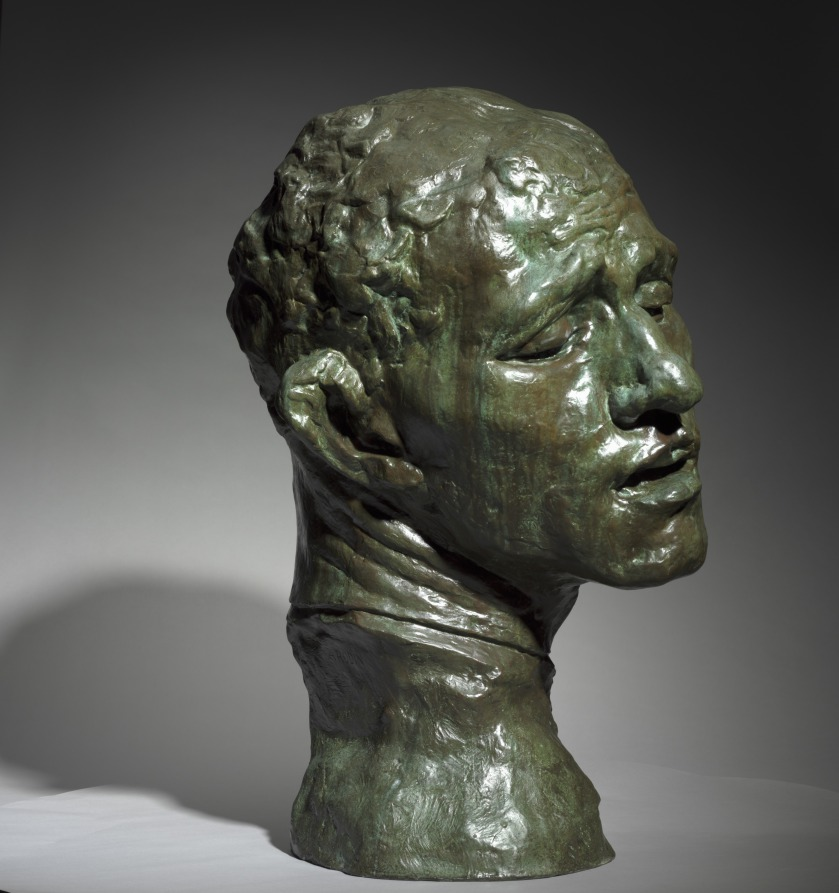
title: Heroic Head of Pierre de Wissant, One of the Burghers of Calais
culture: France, 19th century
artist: Auguste Rodin (French, 1840–1917)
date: 1886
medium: bronze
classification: Sculpture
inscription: inscribed at neck, left: A.Rodin; inscribed lower back: Alexis Rudier/Fondeur-Paris.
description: This sculpture depicts one of the figures in Rodin’s large public monument The Burghers of Calais (1884–89), featuring six French men who volunteered to be taken prisoner by the English in exchange for lifting the siege of Calais during the Hundred Years War (1337–1453). Pierre de Wissant’s anguished expression suggests extreme mental suffering as he contemplates his expected execution. Rodin exhibited a life-size version of the figure as an independent work before completing the monument. He later made multiple versions in various sizes and media.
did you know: This sculpture depicts the head of a figure from Rodin's large public monument The Burghers of Calais (1884-89). The CMA also owns a plaster version of the head.